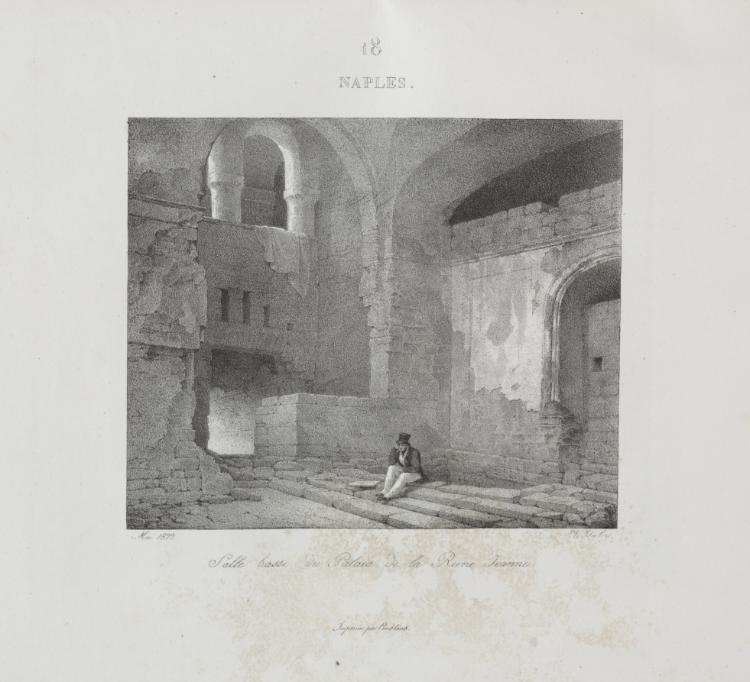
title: Voyage en Italie en 1822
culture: France, 19th century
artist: Jean-Baptiste Isabey (French, 1767–1855)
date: 1833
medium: lithograph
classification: Bound Volume